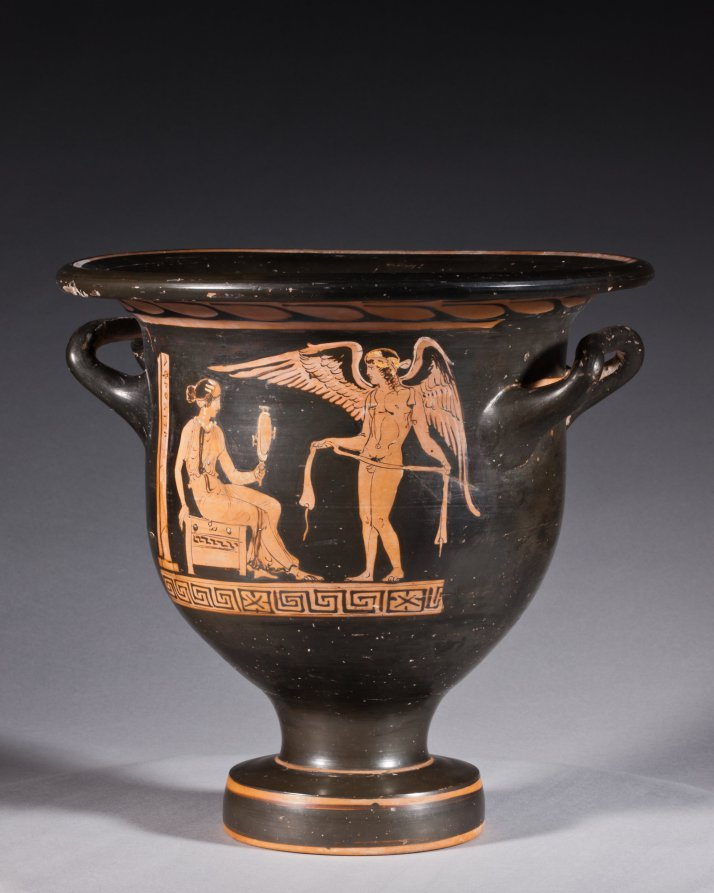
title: Red-Figure Bell Krater (Mixing Vessel): Aphrodite and Eros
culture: South Italian, Apulian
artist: attributed to Graz Painter (South Italian, Apulian, active c. 380–360 BCE)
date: c. 370–360 BCE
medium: ceramic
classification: Ceramic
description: This small mixing vessel shows a finely dressed woman seated on a chest and holding up a mirror to admire herself. Before her stands Eros, the winged god of love, holding a ribbon or sash. Behind the woman stands a pillar with the inscription ΑΦΡΟΔΙΤΗ, or APHRODITE, the goddess of love. Such labels are rare on vases, and scholars debate whether this names the woman shown as Aphrodite herself, with her son Eros, or a bride envisioning herself as Aphrodite, just before her wedding.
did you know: The dancing nude youths on the reverse are unusual; typically they would be standing and draped.